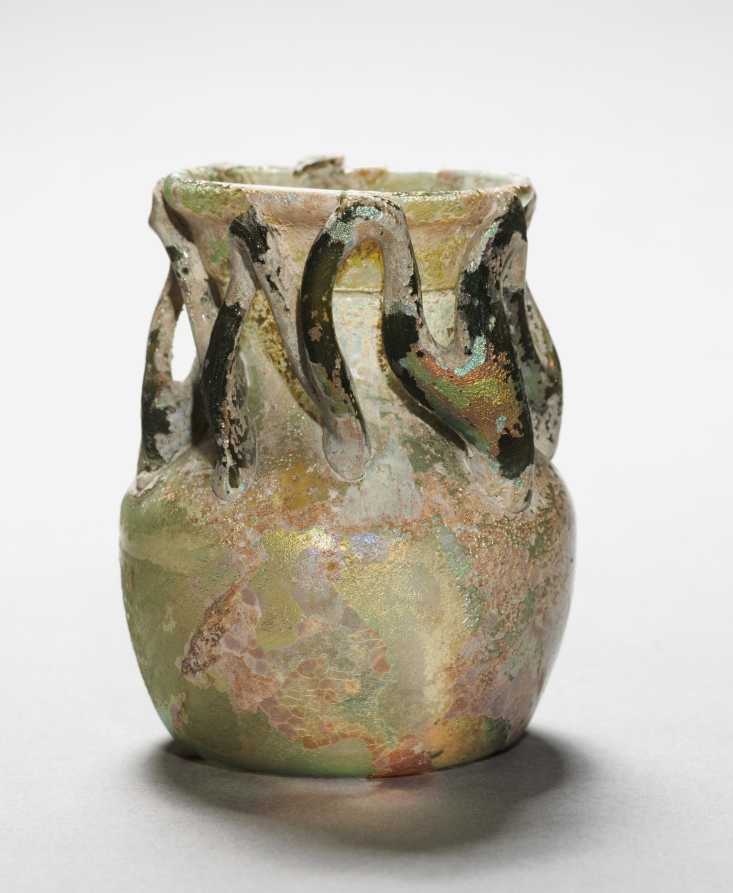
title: Vase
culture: Italy, Roman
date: 100–300 CE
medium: glass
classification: Glass